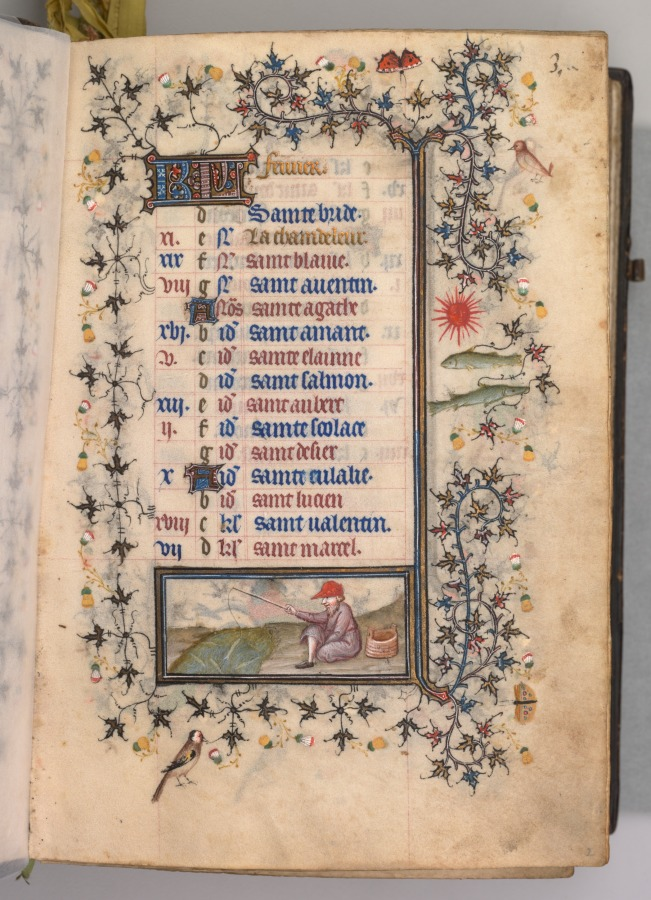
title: Hours of Charles the Noble, King of Navarre (1361-1425): fol. 2r, February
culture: France, Paris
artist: Master of the Brussels Initials and Associates (French)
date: c. 1405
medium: ink, tempera, and gold on vellum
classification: Bound Volume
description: This precious book was highly prized by its owner, Charles III, King of Navarre, a French-born prince whose coat of arms is painted on 20 folios. Charles visited Paris on numerous occasions and likely acquired this volume there in 1404. Paris was the center of the European book trade at the time and attracted illuminators from many parts of Europe. This manuscript represents one of the most remarkable fusions of French and Italian taste in book illumination. Though conforming to Parisian standards, most of the book’s major miniatures are the work of the Brussels Initials Master, an Italian illuminator who previously worked in Bologna and Padua.